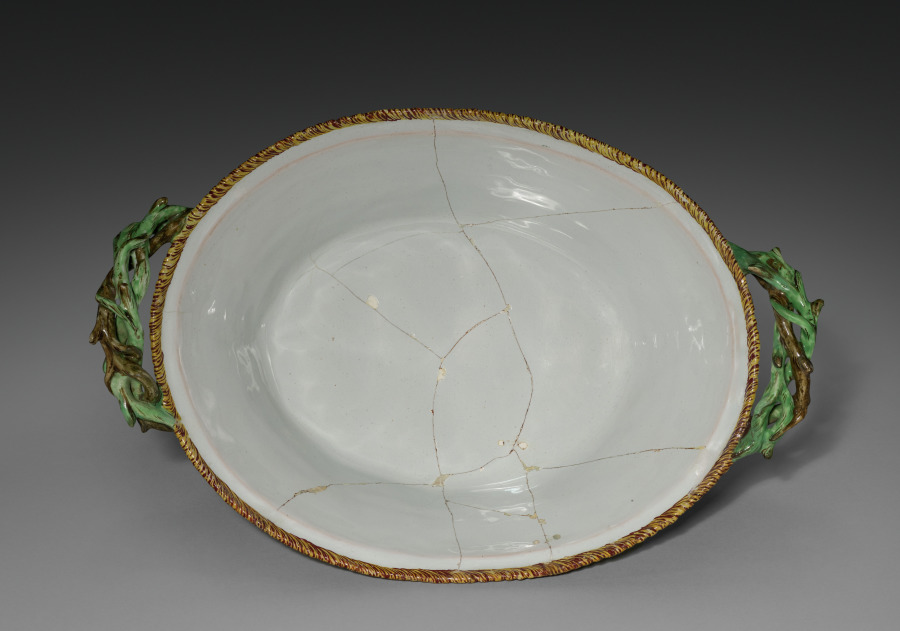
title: Tureen in the Form of a Basket of Game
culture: France, 18th century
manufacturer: Sceaux Factory (French, active 1748–66)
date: c. 1755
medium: Tin- glazed earthenware (faience) wth enamel decoration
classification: Ceramic